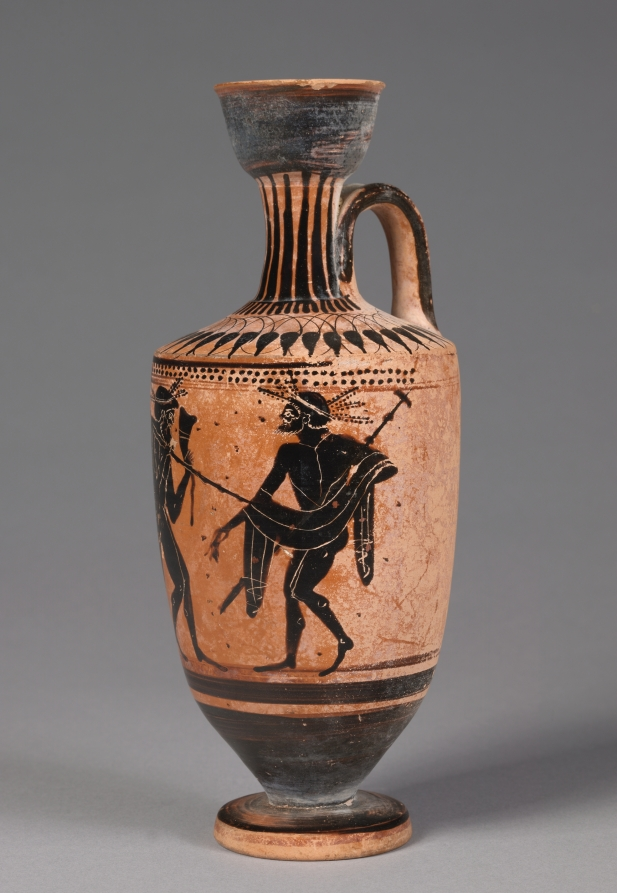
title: Black-Figure Lekythos (Oil Vessel): Komos (Revel)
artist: attributed to The Group of Cleveland 16.1061 (name vase)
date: c. 500 BCE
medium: ceramic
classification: Ceramic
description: Three bearded figures dance or cavort on this oil vessel, each wreathed, loosely draped with a cloak, and holding a staff. The central figure also holds a drinking horn, though all may well have been drinking. The painter of this vase is unknown, but the style of drawing has been linked to a similar vessel now in Syracuse, Sicily.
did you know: The small black marks between and around the figures are mock letters, perhaps indicating illiteracy.